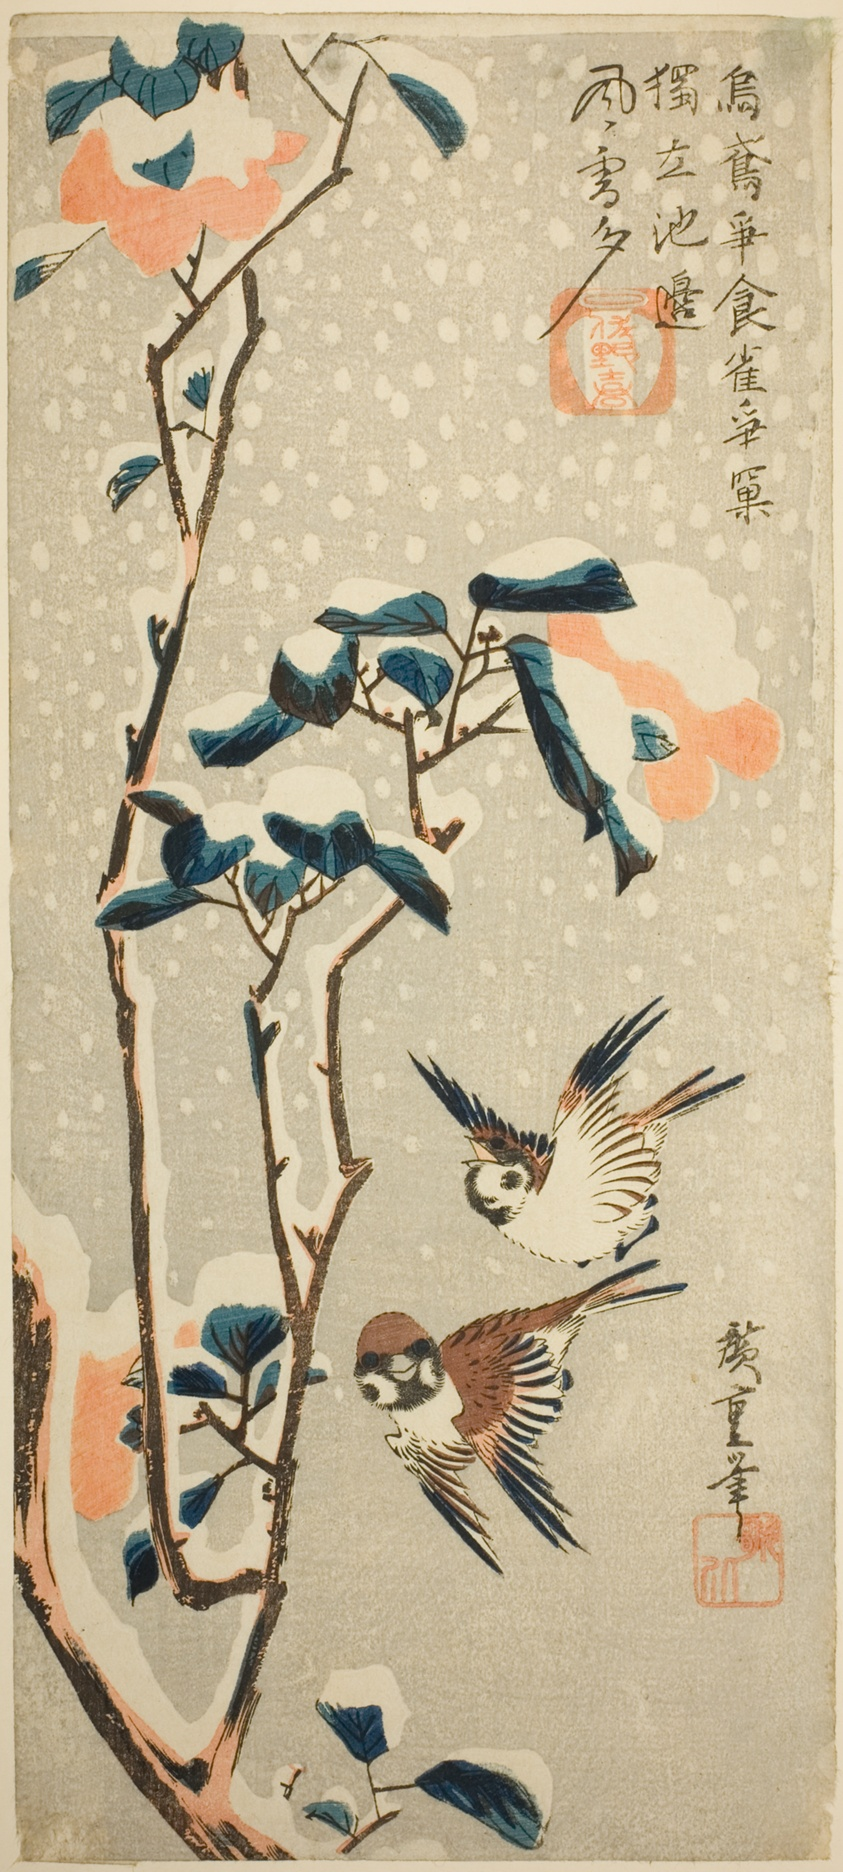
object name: Print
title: Sparrows and Camellia in Snow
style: Japanese (culture or style)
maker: Utagawa Hiroshige 歌川 広重; Japanese, 1797–1858; Publisher: Samo-Ya Kihei; Japanese; Publisher: Sano-Ya Kihei; Japanese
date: c. 1831/33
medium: Color woodblock print; otanzaku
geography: Japan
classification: woodblock print; print; asian art